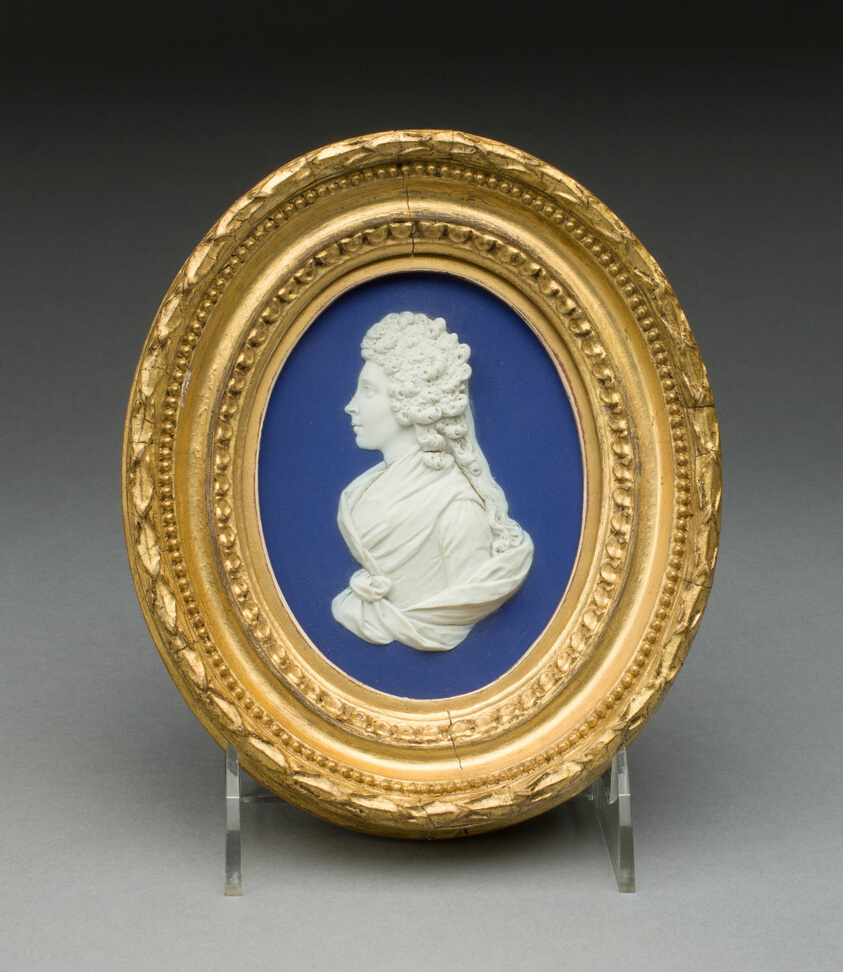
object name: Ceramics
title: Plaque with Portrait of Mrs. William Eden, Lady Auckland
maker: Wedgwood Manufactory (England, founded 1759)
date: c. 1789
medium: Stoneware (jasperware)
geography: Burslem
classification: sculpture; stoneware; european decorative arts; ceramics